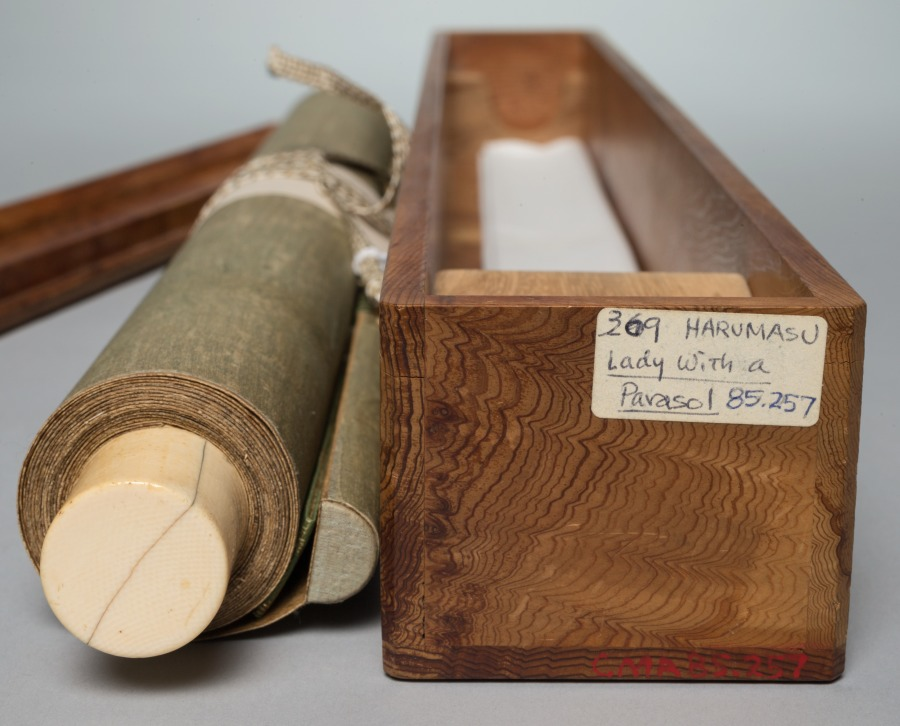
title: Lady with a Parasol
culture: Japan, Edo period (1615–1868)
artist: Koikawa Harumasa (Japanese)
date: early 1800s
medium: hanging scroll; ink, color, gold, and silver pigments on paper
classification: Painting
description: This painting depicts a young woman braving the elements as she hurries home from the local bathhouse. The action depicted accentuates her slender neck and bare legs. In later Japanese art, images of beautiful women in bare feet and a towel between their teeth have sensual overtones.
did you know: Spatters of white paint represent falling snow.